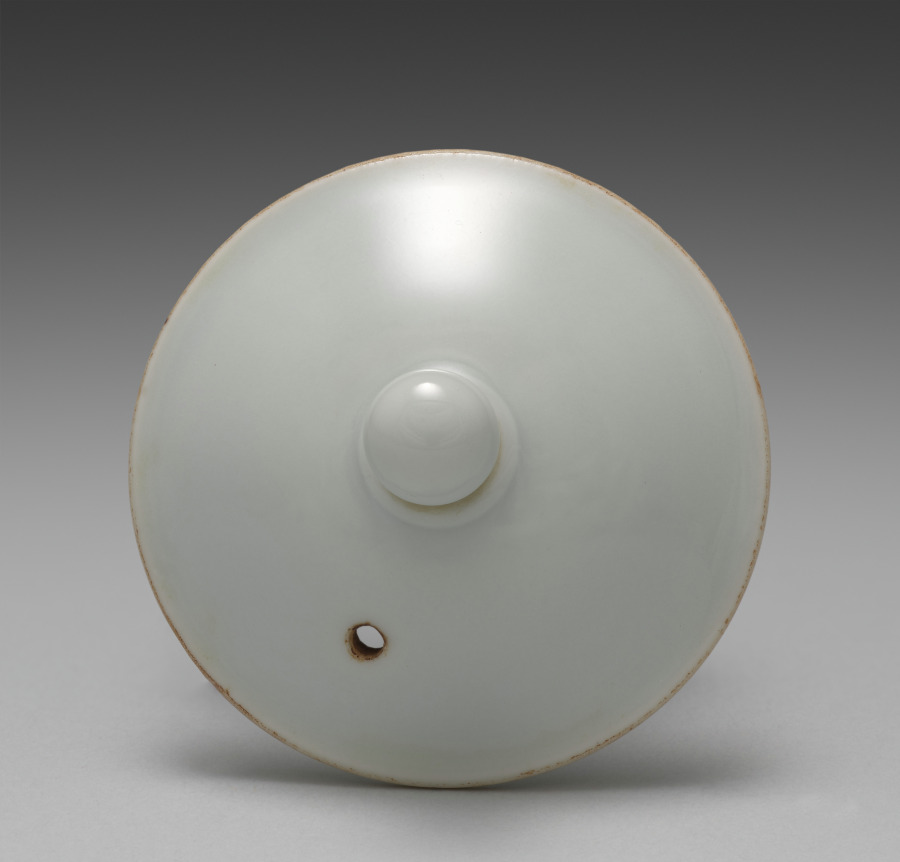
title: Lid for a Teapot with Cherry at Night in Gion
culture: Japan, Meiji period (1868–1912)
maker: Seifū Yohei III (Japanese, 1851–1914)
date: 1893–1914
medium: Porcelain with underglaze blue and iron oxide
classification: Ceramic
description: This side-handled sencha teapot with the cherry tree has a nearly spherical shape, and its recessed lid has an ovoid knob. It has both blue and a purplish brown under the glaze for the blossoms and embers on one side, and the vertical calligraphy identifies the tree as a cherry tree at night in the Gion area of Kyoto. To the right of the tree, smoke billows from a small lantern fire in a basket suspended on a post. In terms of collecting history, a paper inserted into the box of Teapot with Cherry at Night in Gion is of interest. It is a flyer for Yamamoto Shōseidō, a shop (no longer extant) that sold fine Kyoto ceramics in Osaka.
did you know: This teapot features the Japanese theme of a blossoming cherry tree in the Gion area of Kyoto in underglaze blue and brown.